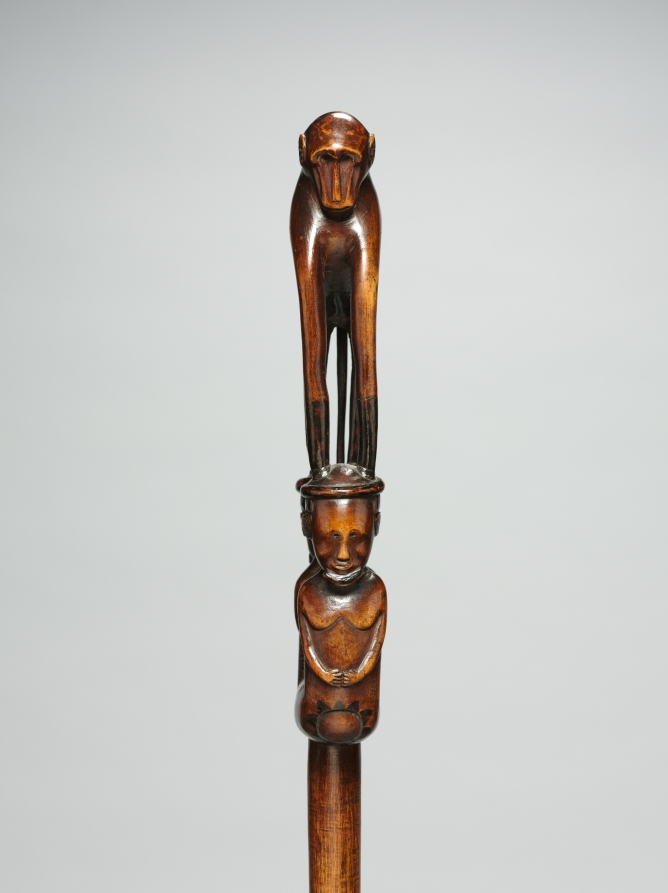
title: Staff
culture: Africa, South Africa, South Africa or Mozambique, probably Tsonga peoples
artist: The Baboon Master (probably Tsonga peoples)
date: 1800s–1900s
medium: Wood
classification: Sculpture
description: Arguably the finest surviving carving of the Baboon Master in a Western collection, this staff features exceptionally sophisticated articulation and detailing. The circular pokerwork motif on one side—which echoes the treatment of the ears on the male heads supporting the baboon—may represent a shield or a leaf. The heads feature the characteristic ornament that signifies maturity and marriage; covered with a mixture of gum, charcoal, and oil, this hairdo, called isicoco, employed a fiber or sinew ring into which the wearer’s hair was woven.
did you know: Artists working on the African continent often moved from place to place; the artist nicknamed The Baboon Master was of the Tsonga culture and worked in the Zulu kingdom.